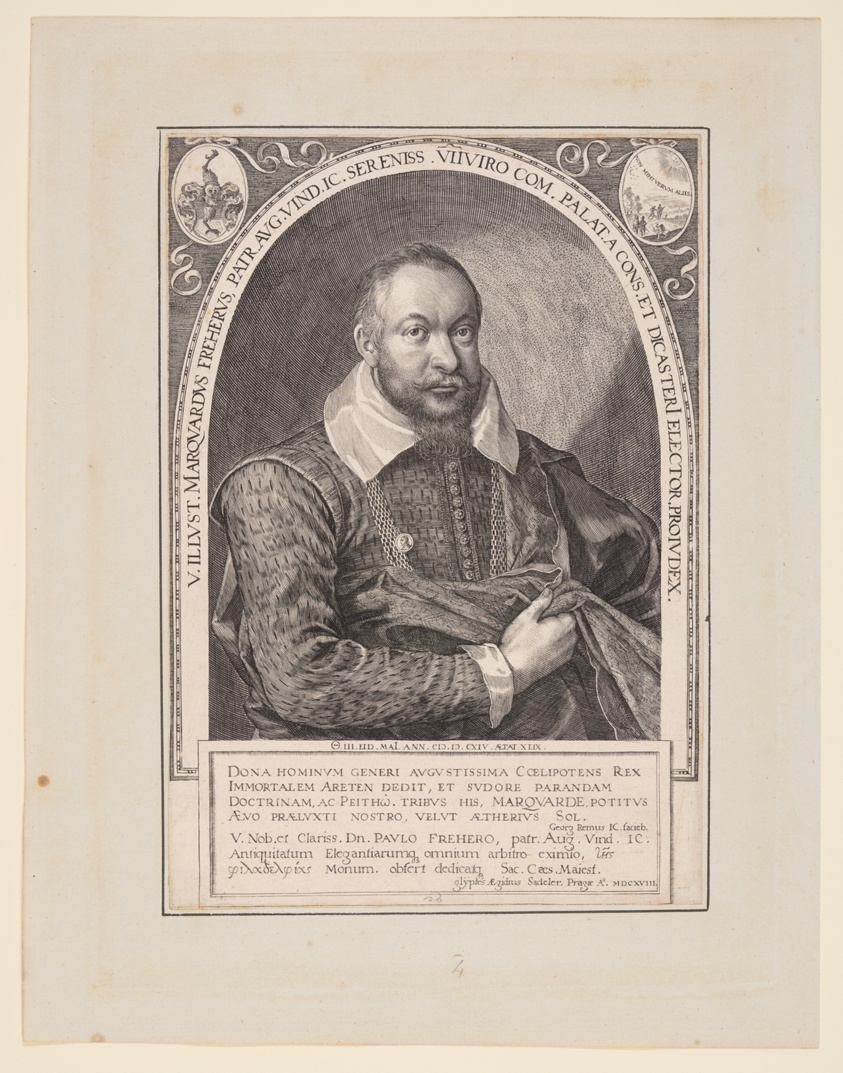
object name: Print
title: Marquard Freher, Diplomat, Historian, and Jurist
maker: Aegidius Sadeler II; Flemish, c. 1570–1629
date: 1618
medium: Engraving on paper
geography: Flanders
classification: engraving; paper; print; prints and drawing